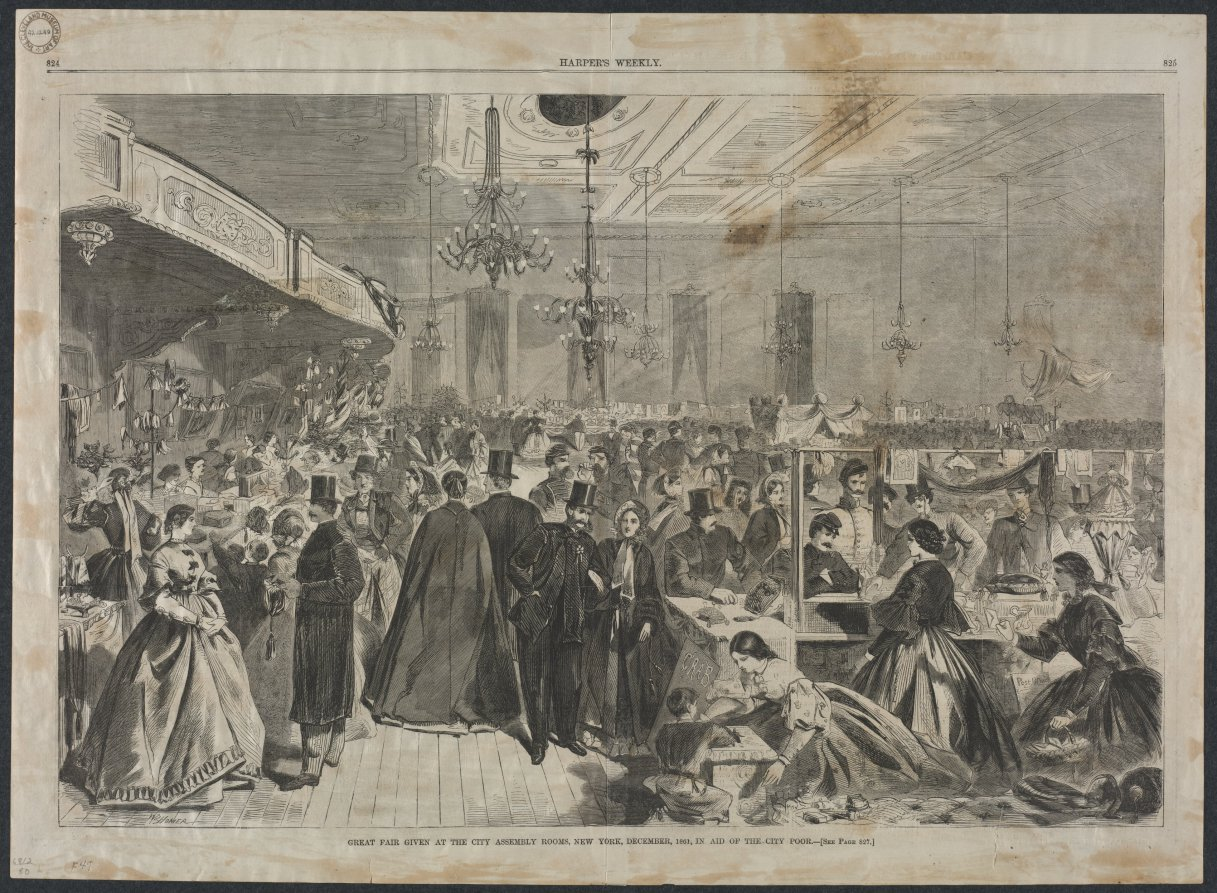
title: Great Fair Given at the City Assembly Rooms, New York, December, 1861, in Aid of the City Poor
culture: America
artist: Winslow Homer (American, 1836–1910)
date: 1861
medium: wood engraving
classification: Print